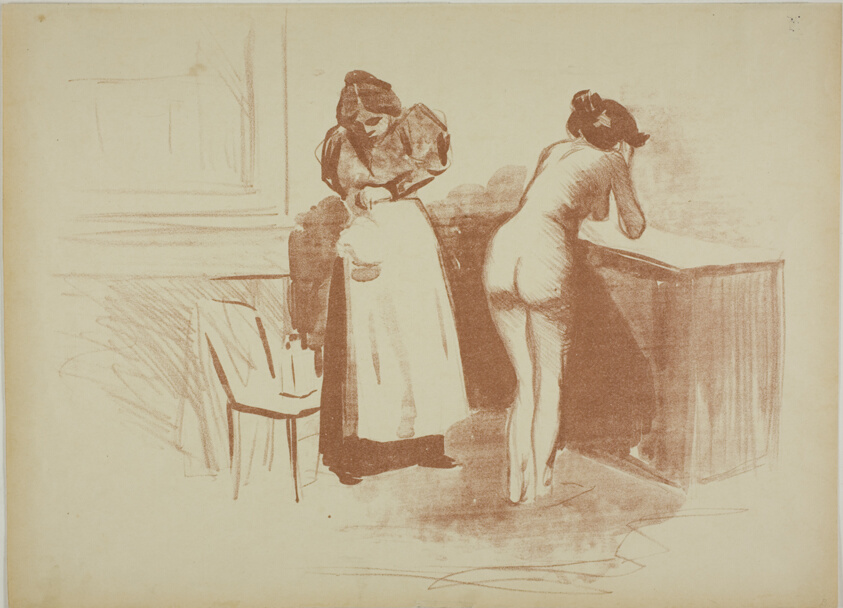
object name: Print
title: The Massage With Coarse Hair Glove, Wash and Line Plate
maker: Jean Louis Forain (French, 1852-1931)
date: 1895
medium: Lithograph in reddish-brown on cream laid paper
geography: France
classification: lithograph; print; prints and drawing